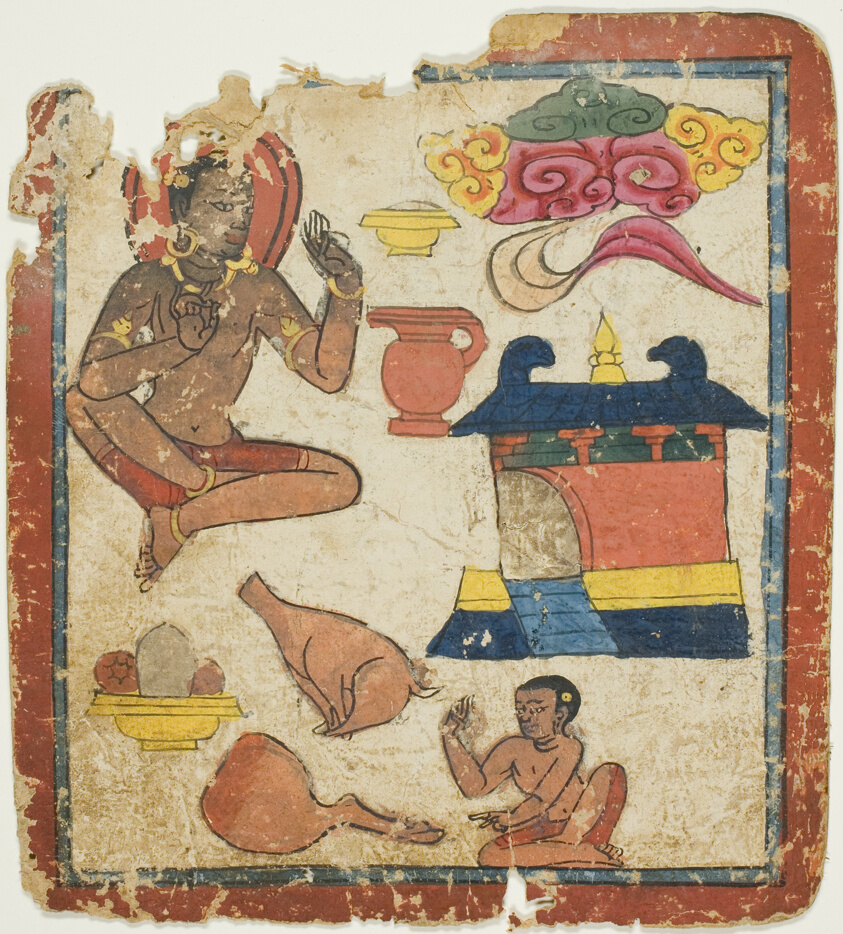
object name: Painting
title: Image from a Set of Initiation Cards (Tsakali)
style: Himalayan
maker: Southern Tibet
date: 14th/15th century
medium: Ink and watercolor on paper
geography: Tibet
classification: ink; painting